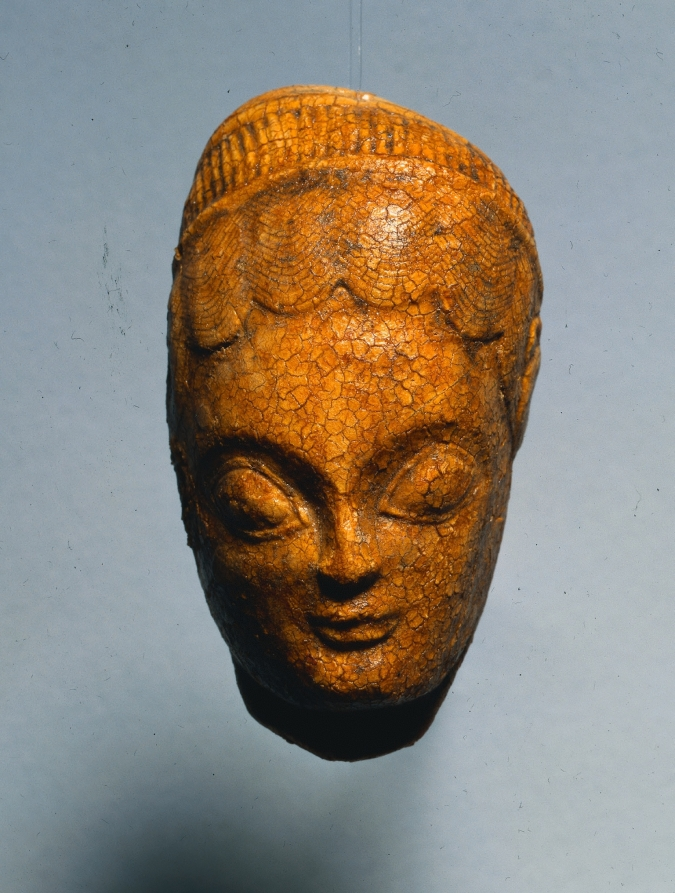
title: Head of a Woman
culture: Italy, Etruscan, "Italic"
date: 600s BCE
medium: amber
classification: Sculpture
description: Amber, a form of fossilized tree resin, was much prized in the ancient Mediterranean world, perhaps due to its mysterious luminosity, fragrance, and magnetism. It was often carved into figures or heads of humans, animals, or mythical creatures. Small perforations on this head suggest that it may once have been mounted, perhaps for use as a pendant. Although now opaque and crackled due to age, in antiquity the surface probably exhibited some degree of translucence, a valued attribute for amulets and ornaments.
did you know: Amber is fossilized ancient tree sap, often imported from the Baltic to the Mediterranean region.